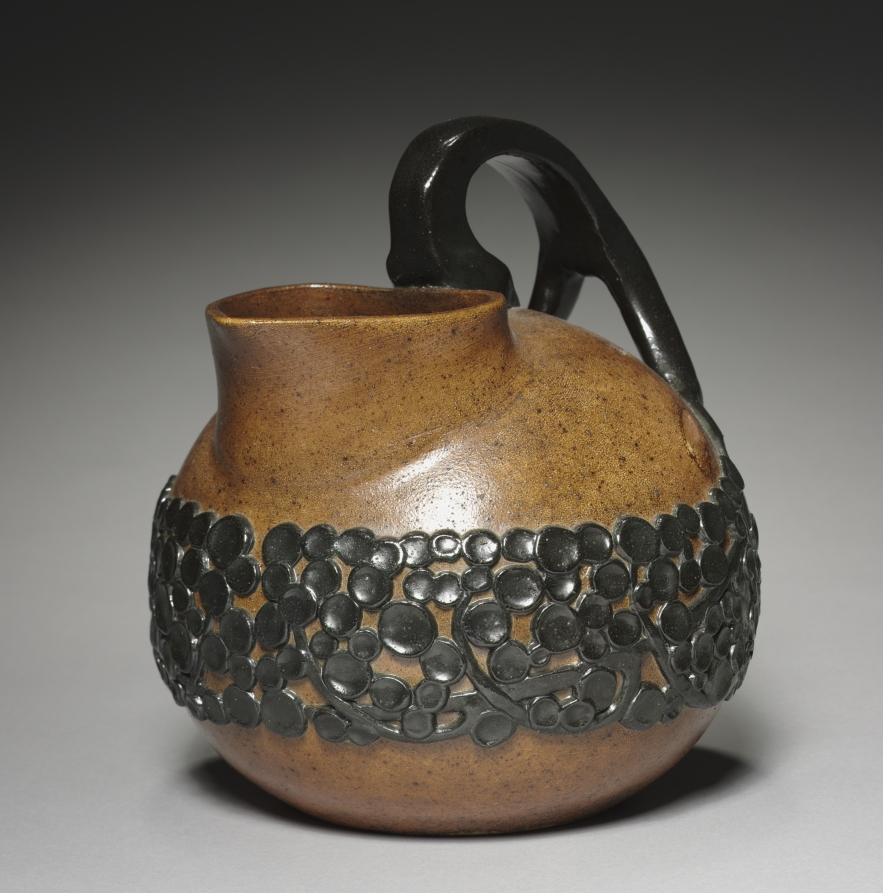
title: Pitcher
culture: Germany, Grenzhausen, early 20th Century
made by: Reinhold Merkelbach, Grenzhausen (German)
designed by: Richard Riemerschmid (German, 1868–1957)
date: c. 1900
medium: stoneware, salt-glaze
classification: Ceramic